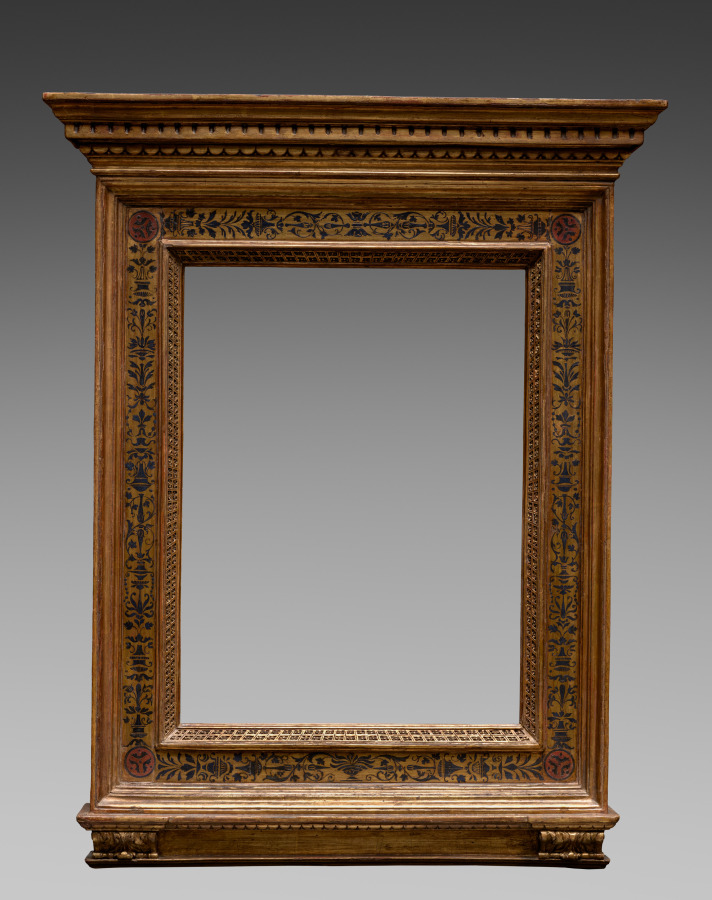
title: Virgin and Child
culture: Italy, late 15th Century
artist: Pintoricchio (Italian, c. 1454–1513)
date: c. 1490–1500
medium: tempera and oil on wood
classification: Painting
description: Bernardino di Betto, called Pinturicchio, is said to have acquired his nickname ("little painter") because of his small stature, and used it to sign some of his paintings. Born in Perugia, the provincial capital of Umbria, he trained under local artists, eventually becoming a paid assistant of the painter Perugino. He is known to have assisted Perugino on his frescoes in the Sistine Chapel and eventually established his own reputation as a respected artist. Many of his commissions were for churches and wealthy families in Umbria and elsewhere. Though the source of this painting is unknown, it was likely produced for a home or private chapel.